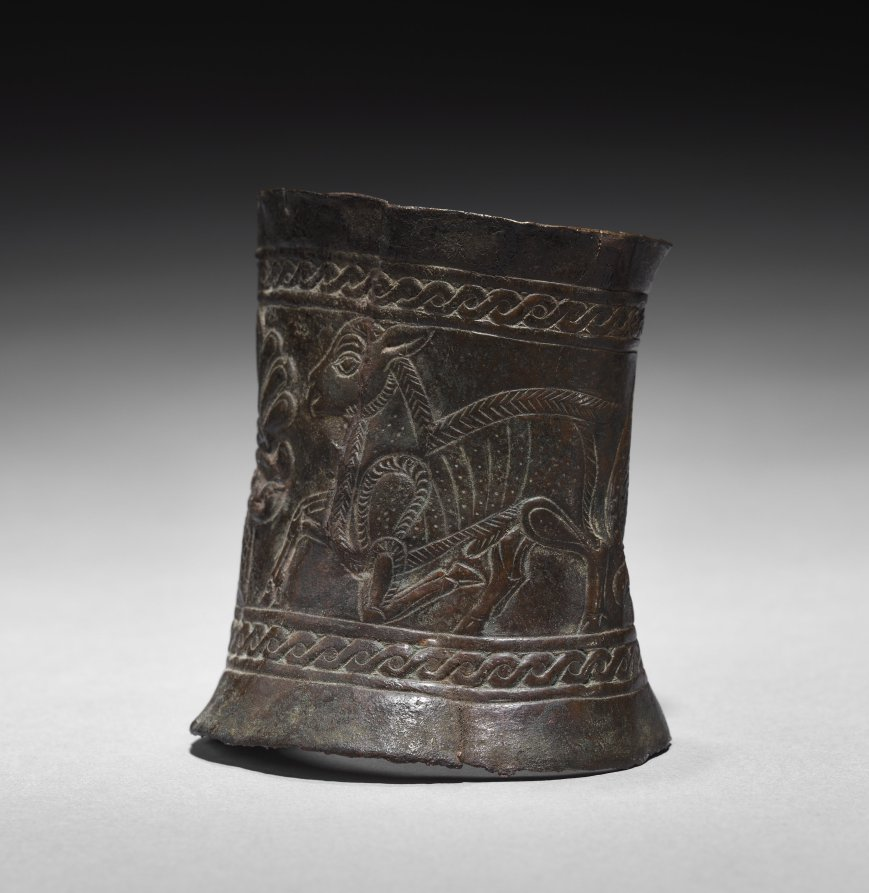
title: Decorated Cylinder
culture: Iran, Mannaean, Ziwiye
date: c. 1000–800 BCE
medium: bronze, repoussé and incised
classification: Metalwork